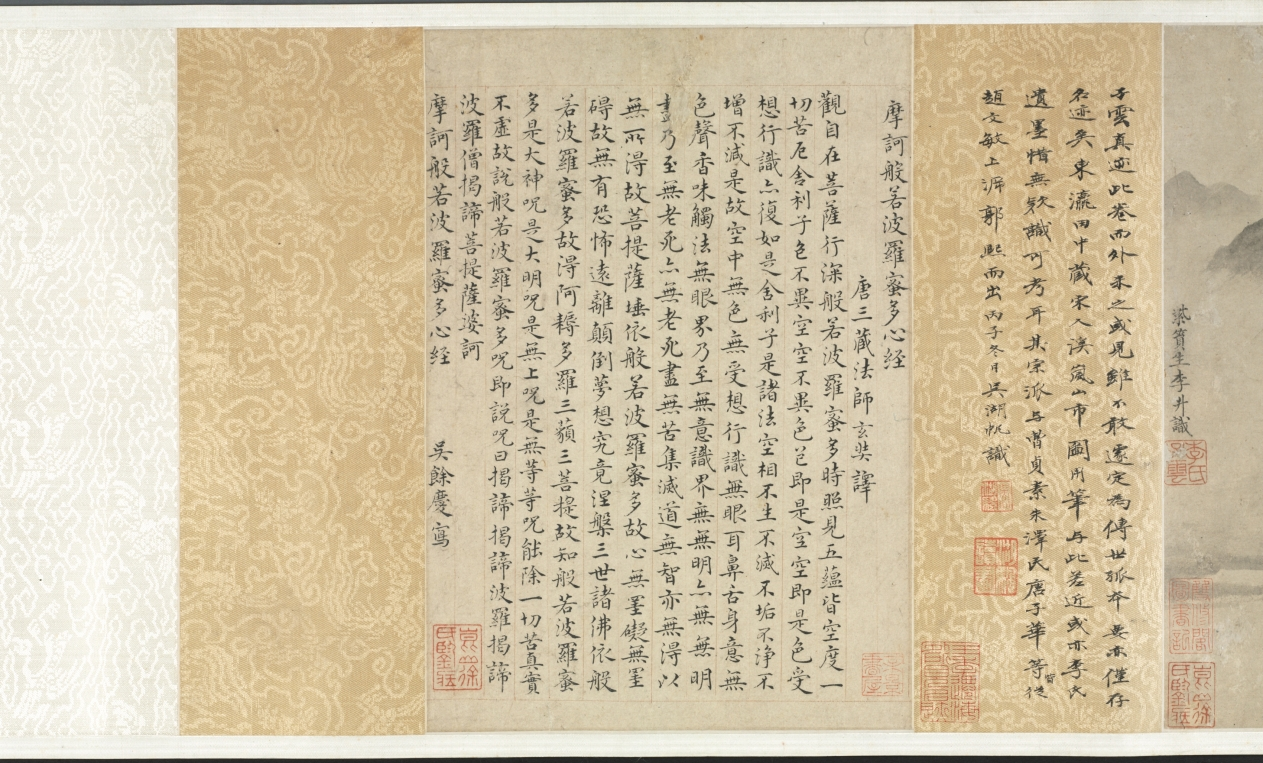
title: Buddha's Conversion of Five Bhiksu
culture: China, Yuan dynasty (1271–1368)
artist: Li Sheng (Chinese, active c. 1324–after 1375)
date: mid-1300s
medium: handscroll; ink on paper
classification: Painting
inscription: 紫篔生李升識 [印] 李氏子雲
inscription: 4 colophons and 12 additional seals: The "Heart" Sutra (Maha Prajnaparamita) text written by Wu Yuqing 吳餘慶 (active early 1400s); 2 seals of Xu Qianxue 徐乾學 (1631–1694); 3 colophons, one dated 1929 and two dated 1936, and 9 seals of Wu Hufan 吳湖帆 (1894–1968); 1 colophon, dated 1932, of Chen Dingshan; 1 seal unidentified.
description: This episode stems from the life of the historical Buddha, who, after his enlightenment, was initially hesitant about preaching his own doctrine. After much personal deliberation and prodding by deities, he finally relented. The first converts were the five guards who served him when he was still a prince. For Li Sheng, this is the pretext of the painting, which moves from the interaction of the bhiksu with the Buddha to a broader awareness of the vast surroundings of the scene.